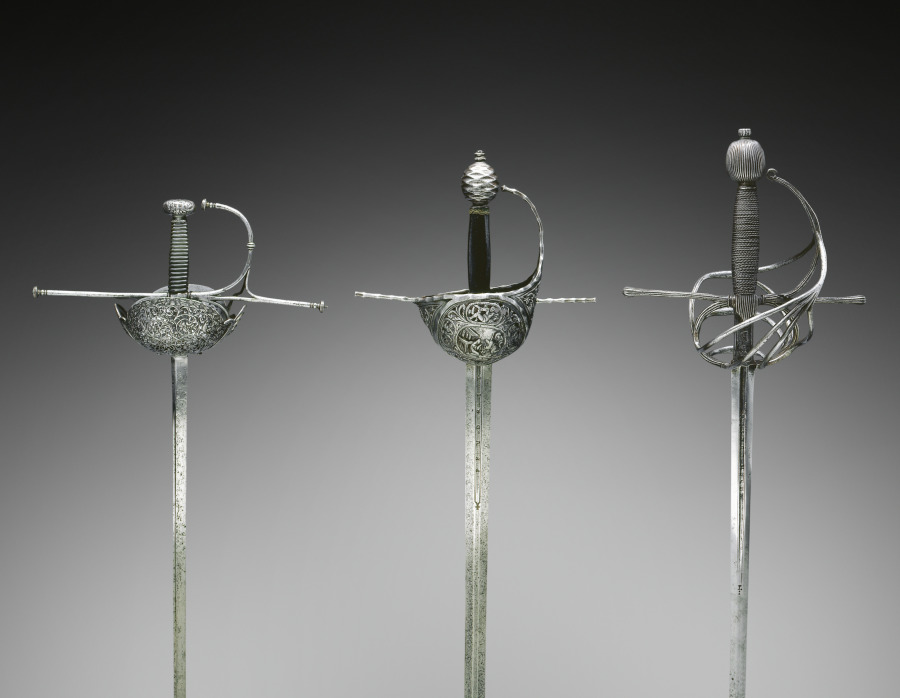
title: Rapier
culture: Blade: Spain, Toledo Hilt: Italt, Belluno?, late 16th-early 17th Century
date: c. 1580–1610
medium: steel, ribbed guard and pommel; wood and wire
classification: Arms and Armor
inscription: PIETRO HERNAN[DJEZ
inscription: three (Toledo and half-moon)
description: The rapier was a sword worn with civilian dress and used in duels. The term rapier derives from the 16th-century French word rapière, which in turn derived from the Spanish espada ropera, or “dress sword.” The rapier was a light weapon with a straight double-edged and pointed blade that, with the development of the art of fencing in the 1500s and 1600s, gradually became narrower and lighter, and thus suitable for thrusts only. With the new technique of swordplay emphasizing the point of the blade, sword guards became more complex to protect the duelist’s unarmored hand. These elaborate guards were frequently decorated by various techniques—chiseling, bluing, russeting, and damascening.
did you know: During this time fencing academies were already in existence in Milan, Venice, Verona, and Madrid, and the rules of fencing evolved with two styles dominating, the Spanish and the Italian.